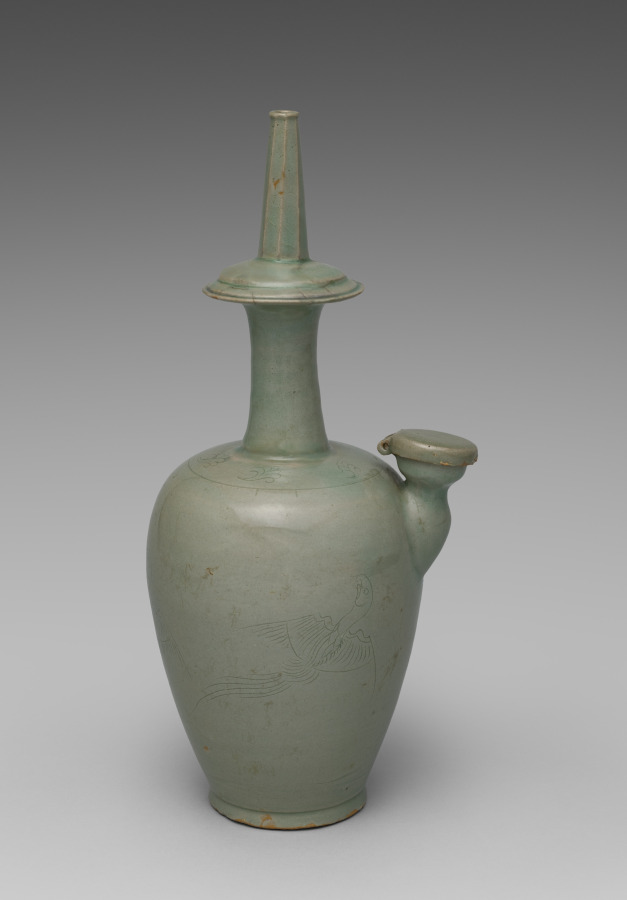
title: Water Ewer for Rituals (Kundika) with Incised Parrot Design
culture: Korea, Goryeo dynasty (918–1392)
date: 1100s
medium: stoneware with celadon glaze, incised and carved decoration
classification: Ceramic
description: This distinctively shaped celadon vessel is a kundika. With a spout on one side, this type of vessel is often used in Buddhist purification rituals. Unlike most existing examples that have an image of a willow tree, this work has a rare flying phoenix design incised on its surface. During the Goryeo period (918-1392), about 260 kilns operated in mainly Jeolla and Chungcheong provinces, meeting a soaring demand for high-end products like this example.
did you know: Unlike most existing examples that have an image of a willow tree or lotus pond, this ewer bears an image of flying parrots delicately incised on its surface.